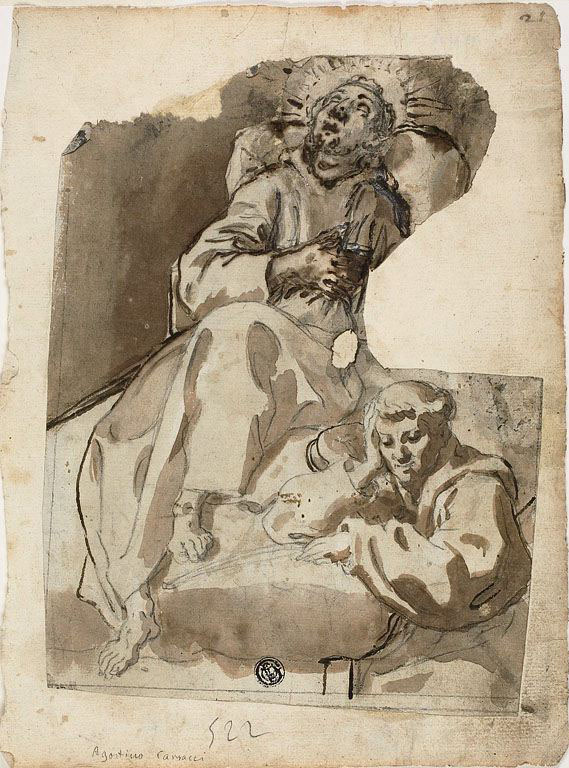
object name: Drawing and Watercolor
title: Death of a Saint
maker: Unknown Artist; Italian or Spanish, 1575-1600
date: c. 1580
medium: Black chalk with brush and brown wash, and incising, heightened with touches of white gouache, on ivory laid paper, pieced and partially laid down on ivory laid paper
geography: Spain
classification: chalk and wash; drawings (visual works); prints and drawing